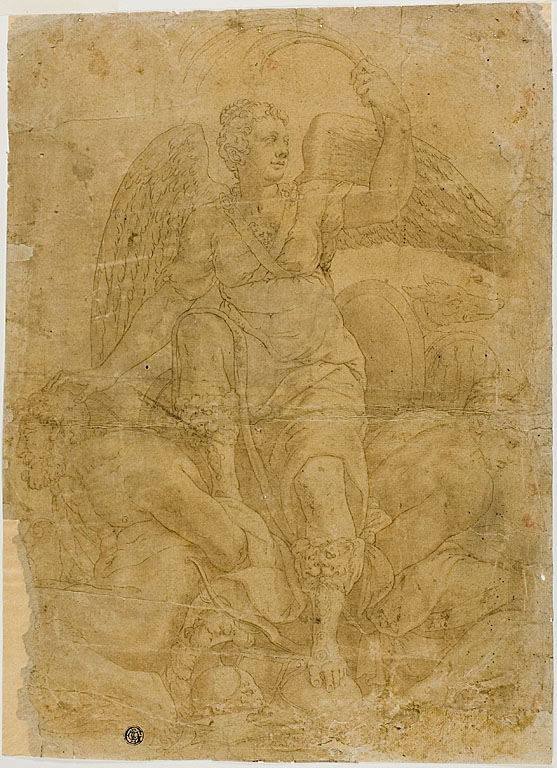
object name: Drawing and Watercolor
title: Allegory of Victory with Two Captives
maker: Follower of Giorgio Vasari (Italian, 1511-1574)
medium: Pen and black ink, with brush and brown wash, on tan laid paper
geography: Italy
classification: ink with wash; drawings (visual works); prints and drawing